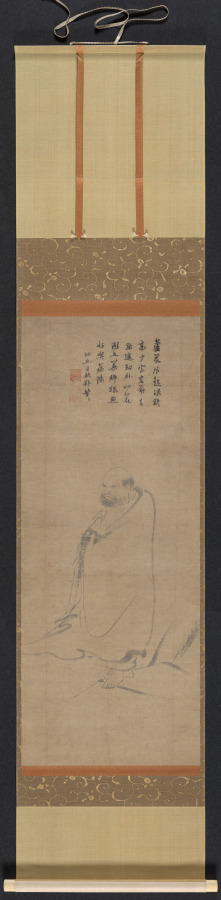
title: Bodhidharma Crossing the Yangzi on a Reed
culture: China, Yuan dynasty (1271-1368)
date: 1300s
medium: hanging scroll; ink on paper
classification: Painting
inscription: 蘆花風起浪頭高，少室岩前去路遙。/ 劫外一花開五葉，腳跟正好喫藤條。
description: Chan Buddhism was introduced to China in the early 500s by the Indian monk Bodhidharma, or Puti Damo (died before 534). Upon his arrival in China, Bodhidharma was allegedly granted an audience with the Liang dynasty emperor Wu (reigned 502–49). Realizing the emperor did not understand his mission, the monk left Nanjing, crossed the Yangzi on a reed, and settled north in Henan province’s Shaolin monastery. Here, Bodhidharma is sketched in few pale brushstrokes. The diluted and swift lines on an empty ground emphasize the Chan idea that all things are illusionary. The inscription reads: Wind rises from the reed flowers, the waves are high; It’s a long way to go beyond the cliff of the Shaoshi mountain; Above the worlds of kalpas a flower is opening into five petals; So that your barefoot heels are just fine for the whipping rattans. —translated by Wai-Kam Ho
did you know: Barefooted Bodhidharma sails across the Yangzi River balanced on a thin stalk of reed.